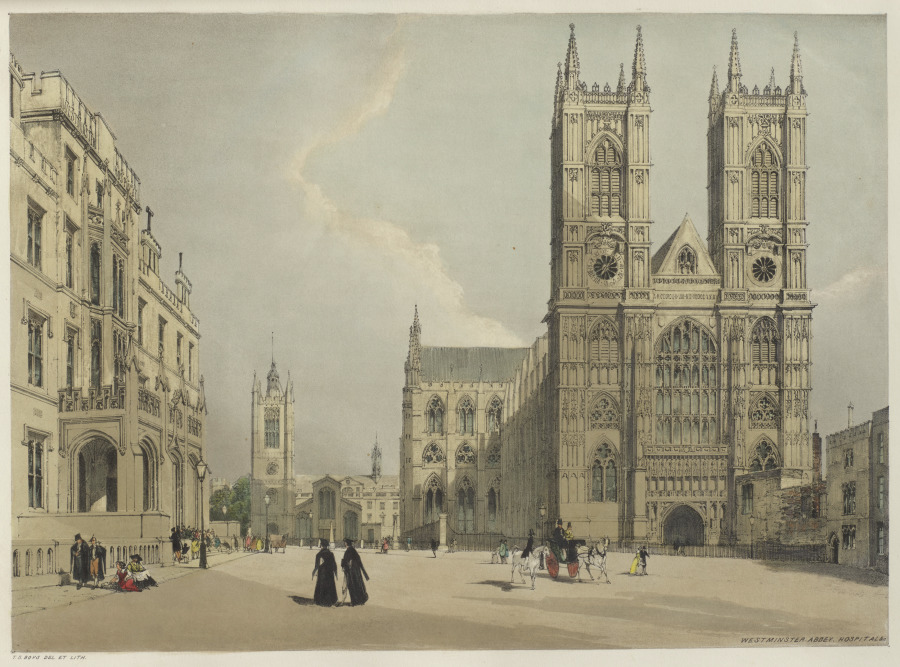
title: London As It Is: Westminster Abbey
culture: England, 19th century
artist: Thomas Shotter Boys (British, 1803–1874)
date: 1842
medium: lithograph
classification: Bound Volume